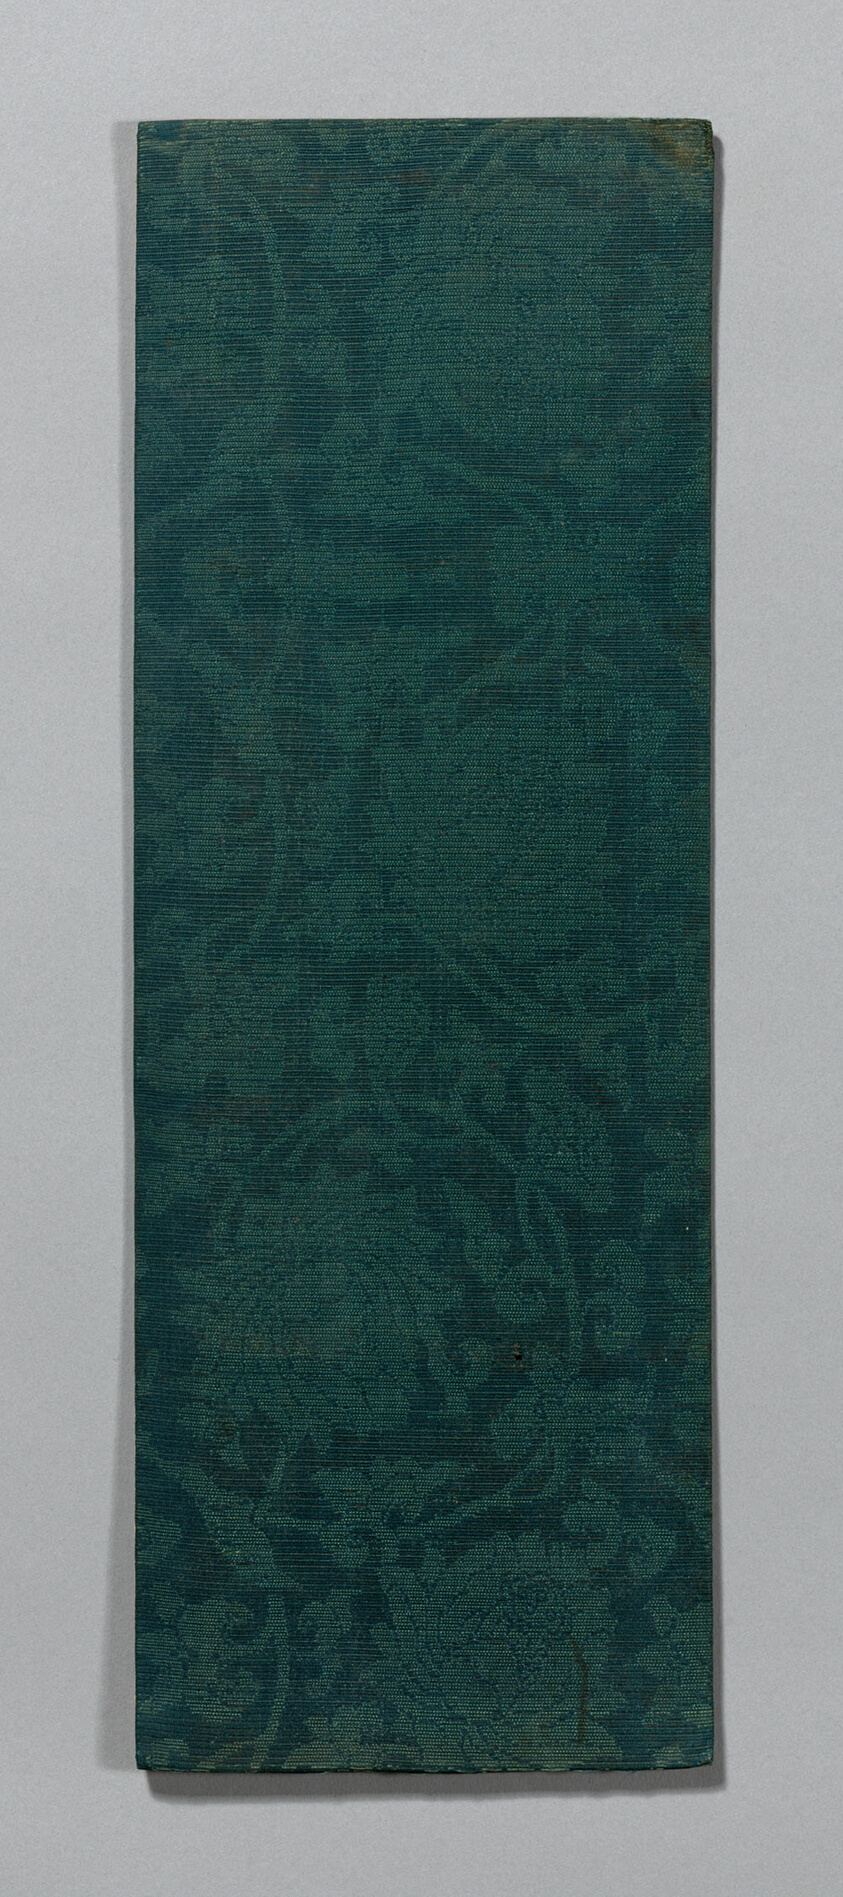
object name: Textile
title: Sutra Cover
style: ming, Chinese (culture or style), East Asian, asian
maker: China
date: Ming dynasty (1368–1644), c. 1590's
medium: Silk, gauze weave with supplementary patterning wefts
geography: China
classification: textile; weaving